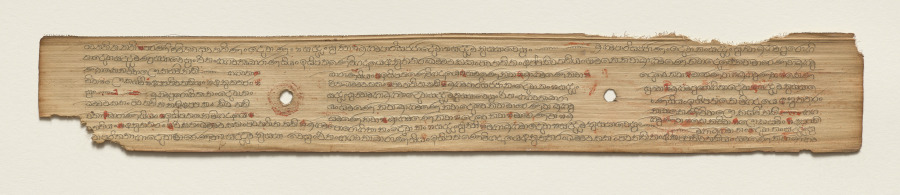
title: Leaf from a Buddhist Manuscript (verso)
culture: Sri Lanka, Singhalese, Late 17th century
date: c. 1700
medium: fiber paper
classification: Manuscript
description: Palm leaf material is still used for manuscripts in Sri Lanka. The palm leaves are prepared first by boiling them, drying them in the sun, and then rubbing them with oils. Scribes then use a metal stylus to incise the text. Then charcoal powder is wiped across the pages, filling in only the inscribed lines.